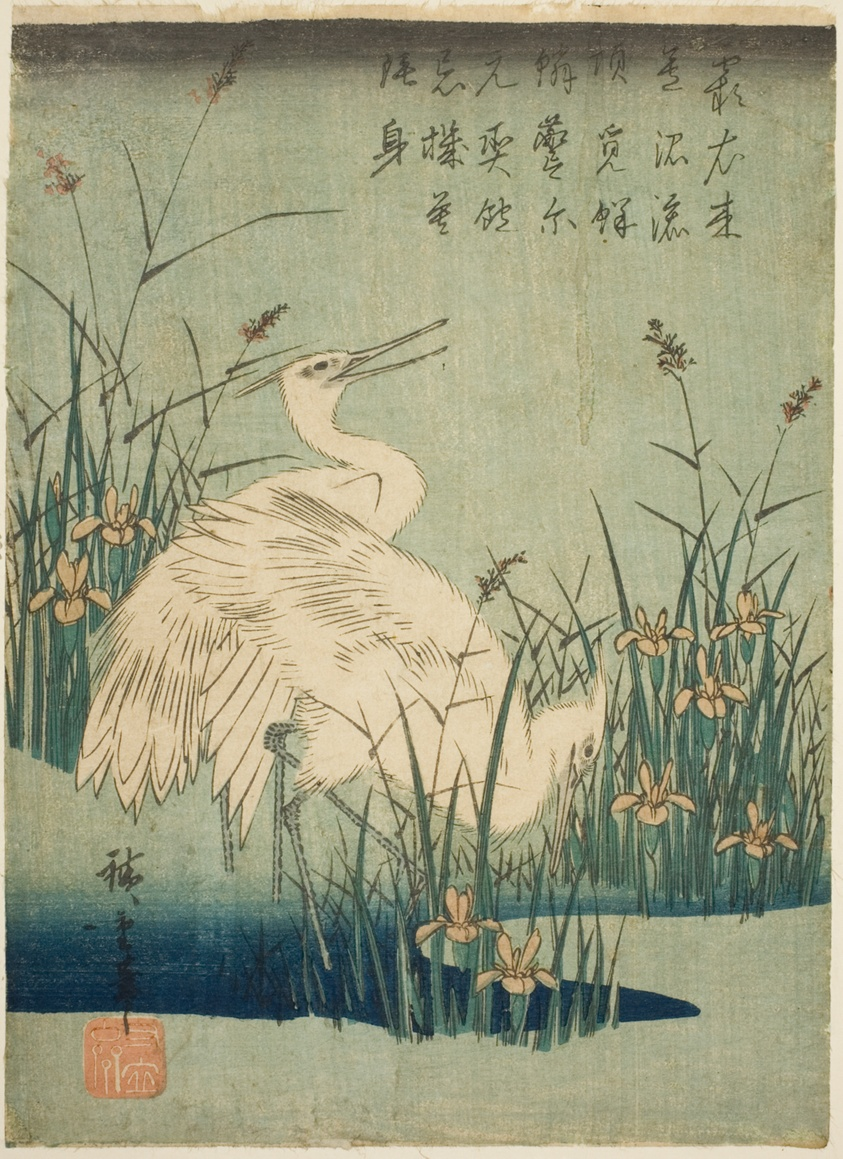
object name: Print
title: White herons and iris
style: Japanese (culture or style)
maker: Utagawa Hiroshige 歌川 広重; Japanese, 1797-1858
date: c. 1830s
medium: Color woodblock print; chuban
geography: Japan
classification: woodblock print; print; asian art